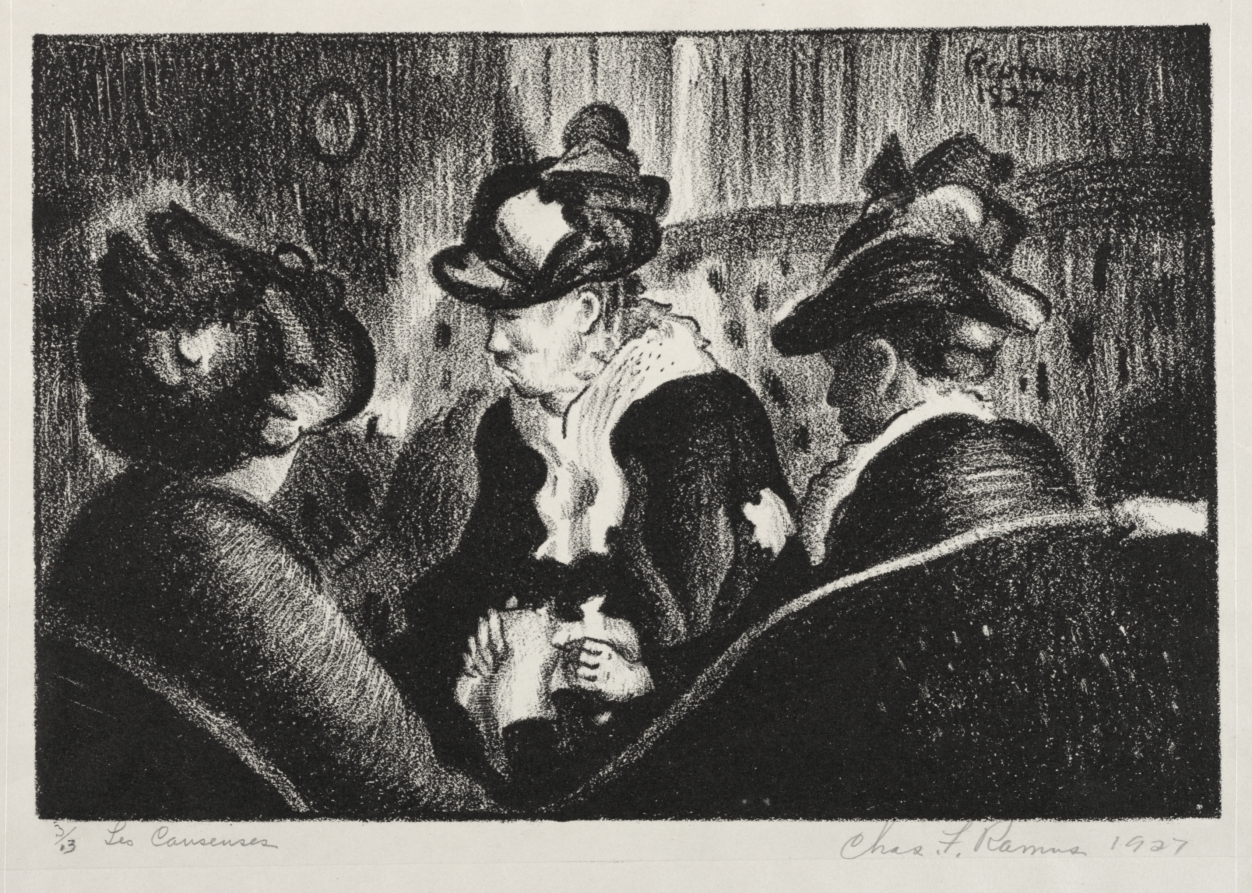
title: The Gossips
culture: America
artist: Charles Frederick Ramus (American, 1902–1979)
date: 1927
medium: lithograph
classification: Print